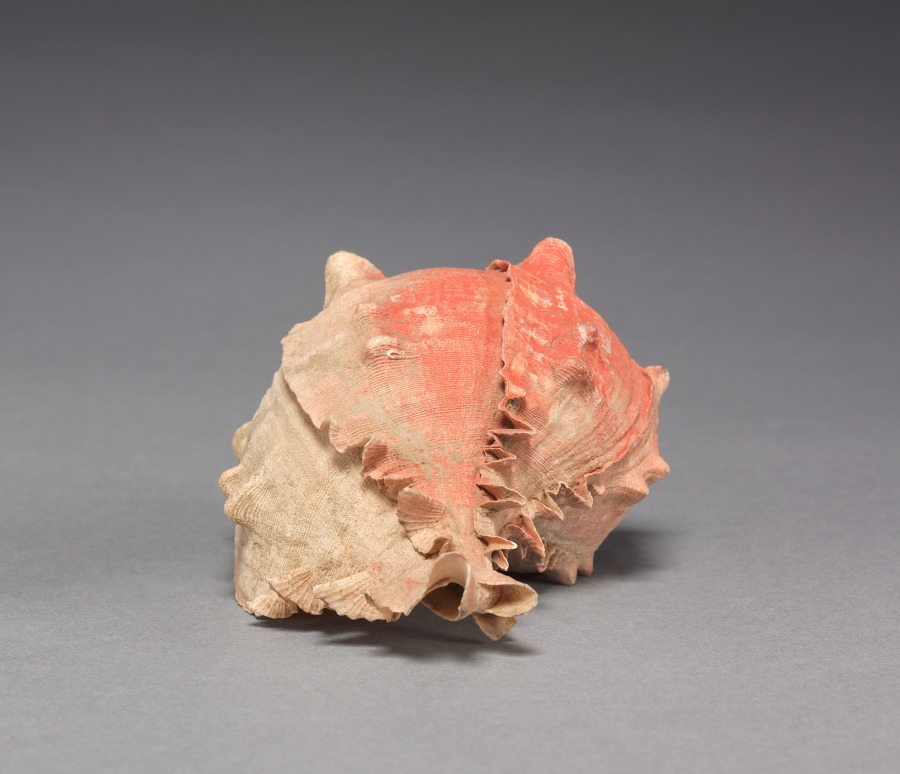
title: Offering Group: Large Shell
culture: Mexico, Guerrero(?), San Jerónimo de Juárez, Xochicalco style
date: c. 800–1200(?)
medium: shell, red pigment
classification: Sculpture